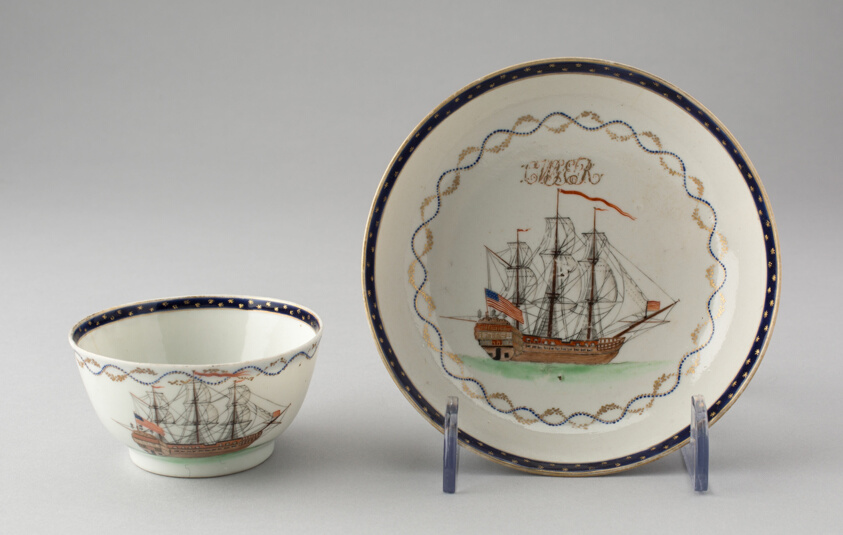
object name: Ceramics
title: Tea Bowl and Dish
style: qianlong, asian, Chinese (culture or style), chinese export, East Asian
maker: China, Qianlong reign; Chinese, made for the American market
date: c. 1784–95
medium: Hard-paste porcelain, glaze, with enamels in colors, and gilding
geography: China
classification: drinking vessel; porcelain; American market; chinese export porcelain; art of the americas; ceramics; decorative arts; pottery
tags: sailing, bowl, plates, Canton, ships, Monograms, dining, drinking